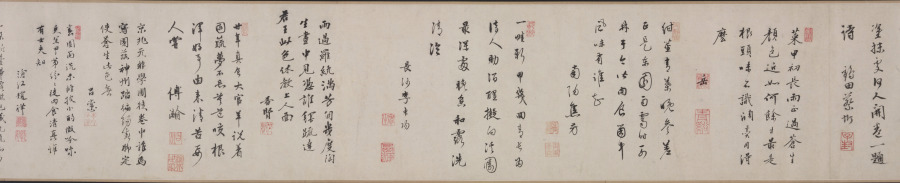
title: Chrysanthemums and Cabbage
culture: China, Ming dynasty (1368–1644)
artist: Tao Cheng (Chinese, active c. 1471–after 1502)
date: c. 1486 or before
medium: handscroll, ink and slight color on paper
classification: Painting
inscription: Artist's seal at beginning of painting: Yun hu 雲湖. Title by Wang Wenzhi 王文治 (1730–1802), date 1756. 2 seals of Wang Wenzhi 王文治 (1730-1802); 3 seals of Ku Yün (n. d.)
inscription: Section A (Chrysanthemums): 1 poem and 1 seal of Zhang Yuanzhen 張元禎 (1437–1507) - Jinshi, 1461; 1 poems and 3 seals of Ni Yue 倪岳 (1444–1501) - Jinshi, 1464; 1 poems and 2 seals of Zhao Xiang 趙祥 (life dates unknown) - Jinshi, 1469; 1 poems and 1 seals of Wu Xixian 吳希賢 (1437–1489) - Jinshi, 1464; 1 poems and 1 seals of Lü Chang 呂㦂 (1449–1511) - Juren, 1471; 1 poems and 3 seals of Fu Han 傅瀚 (1435–1502) - Jinshi, 1464; 1 poems and 1 seals of Feng Jue 馮珏 (life dates unknown) - Jinshi, 1478.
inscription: Chrysanthemums section, poem 1, by Zhang Yuanzhen 張元禎 (1437–1507): Several bushes of chrysanthemums grow in front of the Five-Willow Cottage,/ The yellow ones are really yellow and the white ones white./ This affable and decent fellow, young in years and unsophisticated,/ Has snapped one of the branches to dip in ink. (The Five-Willows Cottage was the home of the poet Tao Qian 陶潛 (Tao Yuanming 陶淵明, AD 365-427).) Chrysanthemums section, poem 2, by Ni Yue 倪岳 (1444–1501): Where at the Eastern Fence can you grieve for the Soul of the Xiang River?/ A man of upright character is mourned within the traces of ink./ White jade with a slight flaw would be a grievance forever,/ Later men should understand why even the roots of the flowers are washed. (Eastern Fence refers again to the poet Tao Qian 陶潛, while the Soul of the Hsiang River refers to the poet Qu Yuan 屈原 (c. 340–278 BC).) Chrysanthemums section, poem 3, by Zhao Xiang 趙祥 (life dates unknown): A clump of chrysanthemum grows in front of the bamboo pavilion,/ The winds of many autumns have blown since we parted beyond the river./ Straining wine through the official's cap of Tao [Qian] to prolong autumn's pleasures,/ The mists and clouds of ten thousand miles belong to the intoxicated. Chrysanthemums section, poem 4, by Wu Xixian 吳希賢 (1437–1489): It is a different spring if mulberry is planted during the latter part of the year,/ The dust of the world originally did not drop on clothing./ Who spills out ink under the Eastern Fence/ And paints so freely this portrait of chrysanthemums for the venerable Sir Tao? Chrysanthemums section, poem 5, by Lü Chang 呂㦂 (1449–1511): This full tray of ink for painting [flowers] at the Eastern Fence;/ Their whiteness or yellowness is not essential in capturing their beauty./ I don't have to go to Jiangnan to see them myself./ At my old house grow two or three branches. Chrysanthemums section, poem 6, by Fu Han 傅瀚 (1435–1502): Who daubed autumn flowers with ink/ As if they were dark dew on a branch tip only vaguely seen at evening?/ After the lazy clouds disperse, no one paints;/ A certain unconventionality pervades this painting. Chrysanthemums section, poem 7, by Feng Jue 馮珏 (life dates unknown): To satisfy his hunger, [the chrysanthemums] have at times entered the poetry of Qu Yuan;/ Taking up the wine cup, it felt close to Tao Qian./ [With them I am like] a lonely root sustained by deep water/ Or an old man to whose hair the color of youth returns.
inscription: Section B (Cabbage): 1 poem and 1 seal of Cai Qi 蔡圻 (life dates unknown) - degree information not known; 1 poems and 3 seals of Ni Yue 倪岳 (1444–1501) - Jinshi, 1464; 1 poem and 3 seals of Jiao Fang 焦芳 (1436–1517) - Jinshi, 1464; 1 poem and 3 seals of Li Dongyang 李東陽 (1447–1516) - Jinshi, 1464; 1 poems and 1 seals of Wu Xixian, signed “Xixian” 吳希賢 - Jinshi, 1464; 1 poems and 3 seals of Fu Han 傅瀚 (1435–1502) - Jinshi, 1464; 1 poems and 1 seals of Lü Chang 呂㦂 (1449–1511) - Juren, 1471; 1 poems and 2 seals of Zhao Xiang 趙祥 (life dates unknown) - Jinshi, 1469; 1 poems and 1 seals of Feng Jue 馮珏 (life dates unknown) - Jinshi, 1478.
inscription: Cabbage section, poem 1, by Cai Qi 蔡圻 (life dates unknown): The ink splashes are fresh from a frosty brush dipped in pond water;/ I can visualize that time when Yunhu 雲湖 [Tao Cheng] first showed his talents./ I lament the places where I scribbled before,/ Who would open them to inscribe a poem? (The first line is an allusion to the famous Jin dynasty calligrapher Wang Xizhi 王羲之 (AD 303-361), who practiced calligraphy so diligently at the edge of a pond that the water turned black with ink.) Cabbage section, poem 2, by Ni Yue 倪岳 (1444–1501): After rain the vegetables begin to grow;/ How are the colors of the masses lately!/ Once you get used to them, the tastiest parts are the ends of the roots;/ I don't know if they can be used for "seasoning soup." ("Seasoning soup" is an allusion to the statesmanship of a chief minister.) Cabbage section, poem 3, by Jiao Fang 焦芳 (1436–1517): This crop of purple stalks and green leaves is late and irregular;/ Now the rainy season is over for the Eastern Garden./ All the nobles nowadays dine on meat;/ Who of them knows the flavor of this [cabbage]. Cabbage section, poem 4, by Li Dongyang 李東陽 (1447–1516): It's always helped the honest man to sober up after drinks./ I intend to go to the deepest part of the stream-crossed garden/ To refresh myself in the fragrance and dew of evening. Cabbage section, poem 5, by Wu Xixian 吳希賢 (1437–1489): After rain, the white silk is filled with fragrant vegetables;/ How many times this happens in Mr. Tao's paintings./ On whom will you depend to present a memorial to the ruler?/ Don't let this color emerge on the faces of the people. (The last line is meant as a warning to officials: the color of the vegetables (green) may be pleasing in itself, but when it emerges on the faces of the starving poor, it signifies a badly governed world.) Cabbage section, poem 6, by Fu Han 傅瀚 (1435–1502): For twenty years I have feasted on the excellent mutton of an official;/ Yet I talk and dream about the garden and its vegetables./ Do not merely say it is good to chew the root of the cabbage--/ You must taste to understand what poverty is. Cabbage section, poem 7, by Lu Chang 呂㦂 (1449–1511): The capital is never a place for an apprentice in the "garden of scholarship."/ Who would write about gardens and vegetables on an examination paper?/ I've walked throughout the country in spring;/ Make sure the people don't show this color. Cabbage section, poem 8, by Zhao Xiang 趙祥 (life dates unknown): After a wash of rain, the spring garden is still in order;/ The flavor [of the cabbage] is more suitable with a small drink and the hum of a tune./ The rich and powerful in their mansions consume dish after dish of meat;/ Vegetarian food is known only by the scholars. Cabbage section, poem 9, by Feng Jue 馮珏 (life dates unknown): A new cabbage is nourished with dew;/ It takes a long time to grow and mature./ The business of "seasoning the soup" is your responsibility;/ Better command the gardener to take care [of the cabbages]. trans. HK/LYSL/WKH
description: On an autumn day in Beijing, Tao Cheng had a gathering with a group of scholar-officials and created two paintings in a spontaneous, casual style. The first depicts chrysanthemums, slender bamboo stalks, and a rock in monochrome ink. Tao applied light colors for the second painting that depicts cabbage. Tao deliberately placed the images on the first sections of the paper so that his honorable guests could add their poetic inscriptions inspired by his imagery. In the first section to the right, all seven poetic inscriptions refer to the beloved poet and recluse Tao Qian (also called Tao Yuanming, AD 365–427) who was particularly known for his profound love for chrysanthemum flowers. Most of the inscriptions in the second section express sympathy for the poor, since cabbage is the main ingredient in their humble food. Taken together, the poems and paintings allude to the life and responsibilities of the scholar-official: the importance of both an upright character and a concern for the poor citizens in order to achieve good government.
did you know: Eminent calligrapher Wang Wenzhi 王文治 was only 27 sui when he wrote the title in 1756.